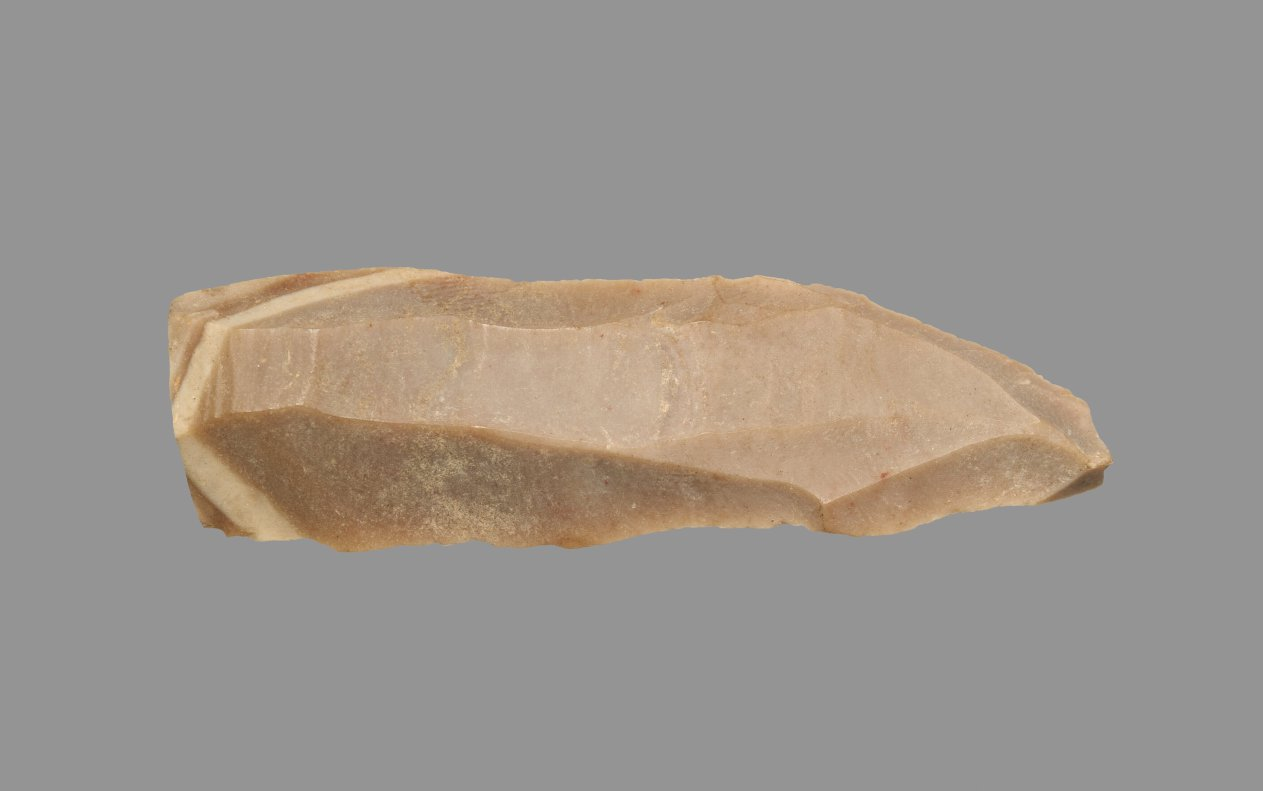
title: Sickle Blade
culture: Egypt, Middle Kingdom (2040–1648 BCE), Dynasty 12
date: 1980–1801 BCE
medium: flint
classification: Implements